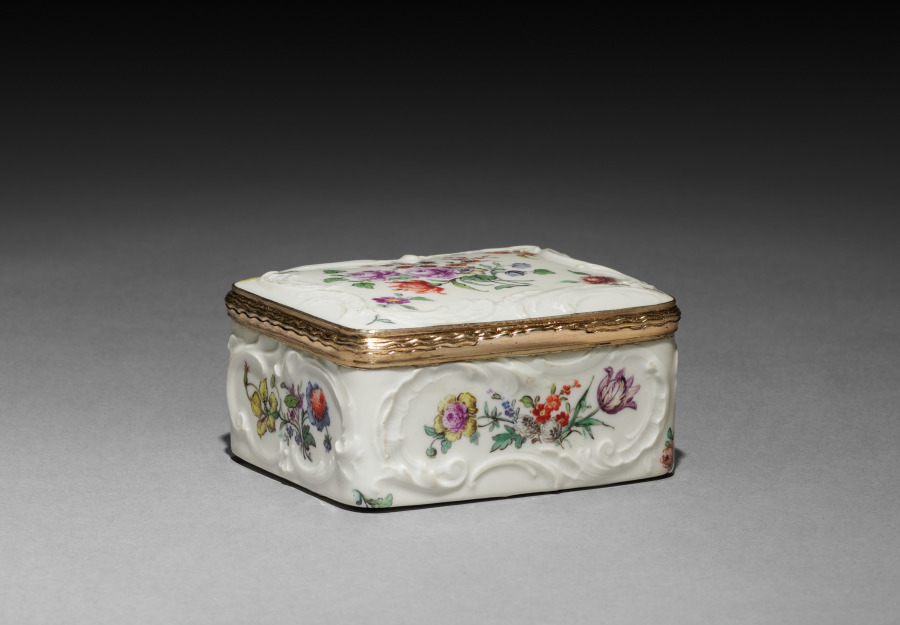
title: Box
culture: South Germany, 18th century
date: 1750–1775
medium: porcelain with silver-gilt mounts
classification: Miscellaneous